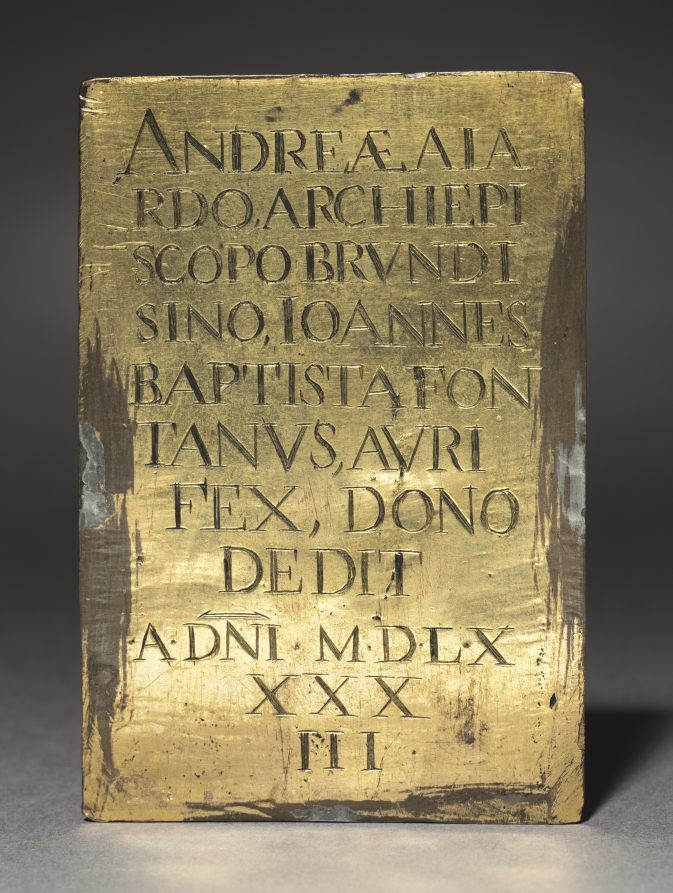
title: Pax with the Adoration of the Magi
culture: Italy, 16th century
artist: Moderno (Italian, 1467–1528)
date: c. 1500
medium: gilt bronze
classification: Sculpture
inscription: inscription on back: ANDREAEAIA RDO, ARCHI EPISCOPO BRVNDI SINO, IOANNES BAPTISTA FONTANVS, AVRIFEX, DONO DEDIT A.DNI.M.D.L.XXXXIII.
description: A pax is a small flat tablet decorated with Christian images and meant to be kissed by the priest before Communion. This plaquette likely had a tabernacle-shaped frame which has been cut away. Here the Madonna sits before a stable with a nude Christ Child seated on her right knee. A star with a long vertical ray radiates in the distance above the stable. Joseph stands on the right edge of the relief, while a nude child, likely a young John the Baptist, appears beside Joseph. The Three Kings approach the Holy Family with gifts, the first kneeling, his arms folded across his chest, while a kneeling male, nude except for a helmet, adjusts the sandal of the third king. A long procession follows the magi, continuing diagonally up the rocky hills in the background. This rocky landscape and crowded figures animate the surface, conveying the excitement and haste as visitors journey to see the newborn king. An inscription on the back of the plaquette reads "This has been given as a gift to Andrea Aiardo, Archbishop of Brundisi by Ioannes Baptista Fontanus, Goldsmith, in the year of our Lord 1583." Other versions of this plaquette exist in the British Museum, the Victoria and Albert Museum, the Louvre, the Berlin State Museums, and the Metropolitan Museum of Art. --Ana Dieglio (2009)